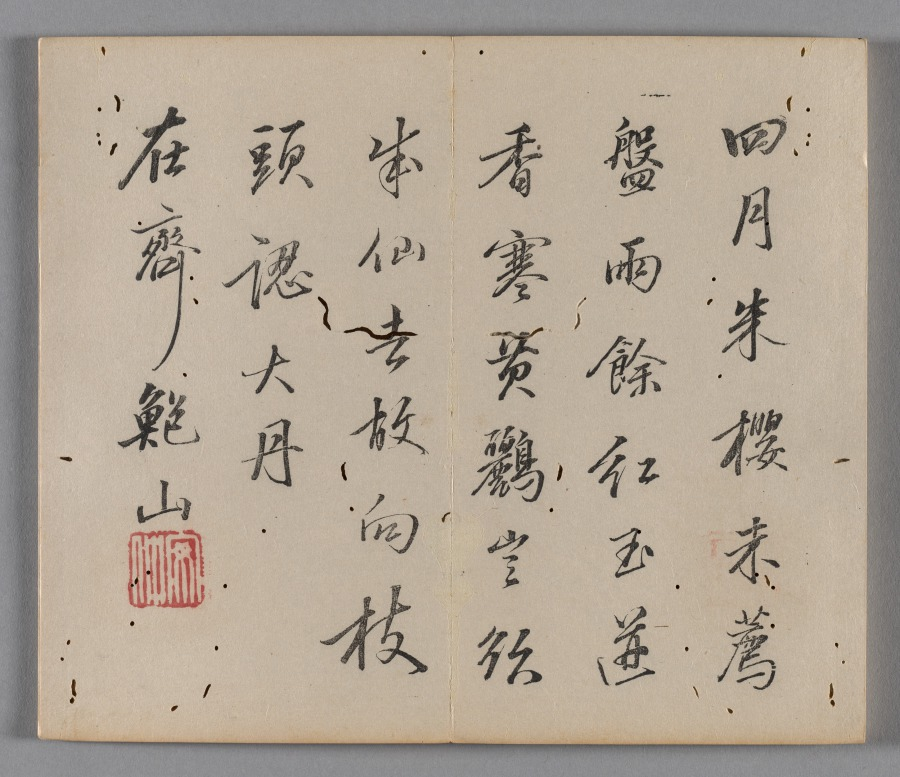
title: Ten Bamboo Studio Painting and Calligraphy Handbook (Shizhuzhai shuhua pu): Miscellaneous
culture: China, Qing dynasty (1644-1911)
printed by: Hu Zhengyan (Chinese, c. 1584–1674)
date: 1633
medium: Woodblock-printed book; ink and colors on paper; first edition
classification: Print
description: Color printing reached a level of perfection in the early 1600s, as seen in this Ten Bamboo Studio Collection of Calligraphy and Painting and the Mustard Seed Garden Manual of Painting (printed 1679 and 1701). The painterly quality, precision in registering (aligning) the woodblocks, and harmonious colors made them the most successful color print editions in Chinese history. Both editions were printed and compiled in Nanjing, spread nationwide, and had a great impact on the arts in Japan and Korea.